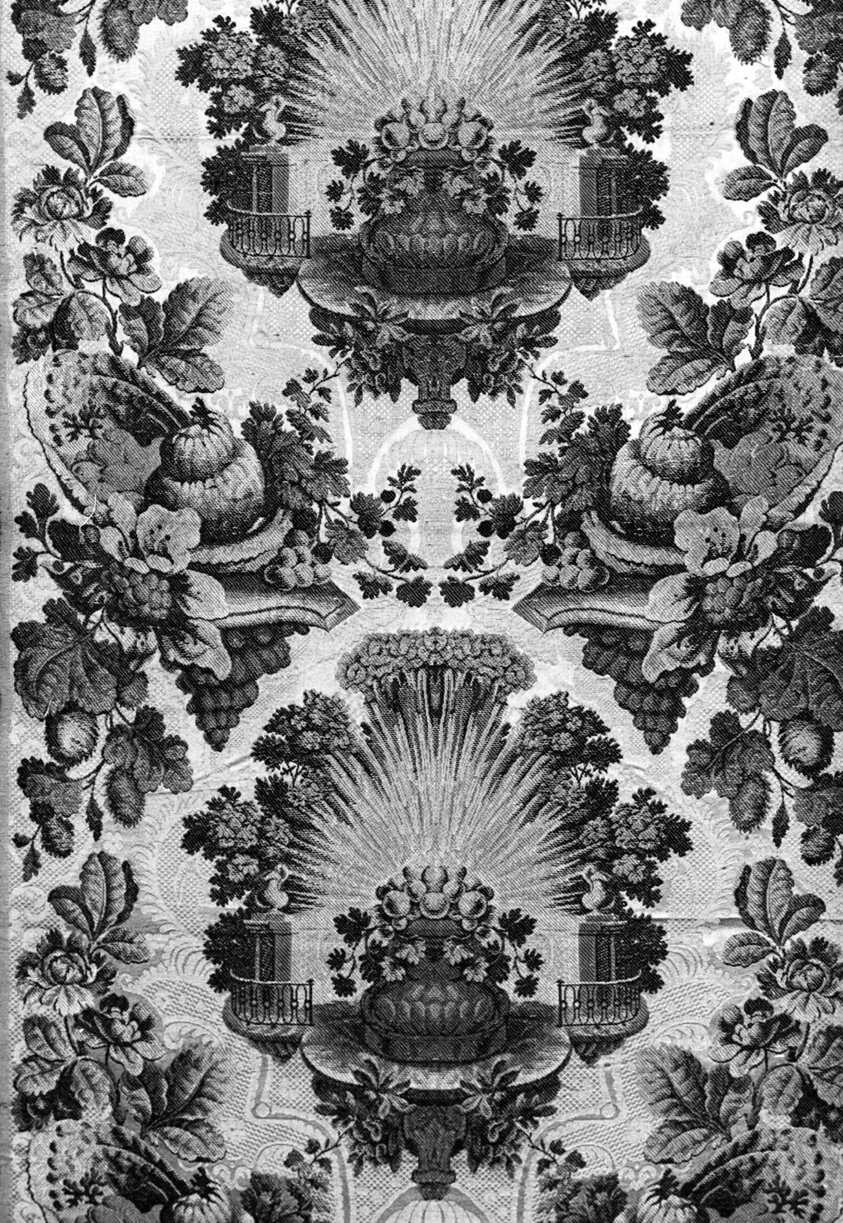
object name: Textile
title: Panel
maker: Produced by F. Schumacher & Co., founded 1889; United States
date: c. 1928/29 (reproduction of an 18th century design)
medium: Silk, wild silk, warp-float faced satin weave with supplementary brocading wefts tied in twill interlacing and self-patterned by ground wefts tied by supplementary binding warps in plain weave backed by twill interlacing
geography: United States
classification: textile; weaving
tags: foliage, grapes, flowers, funerary art